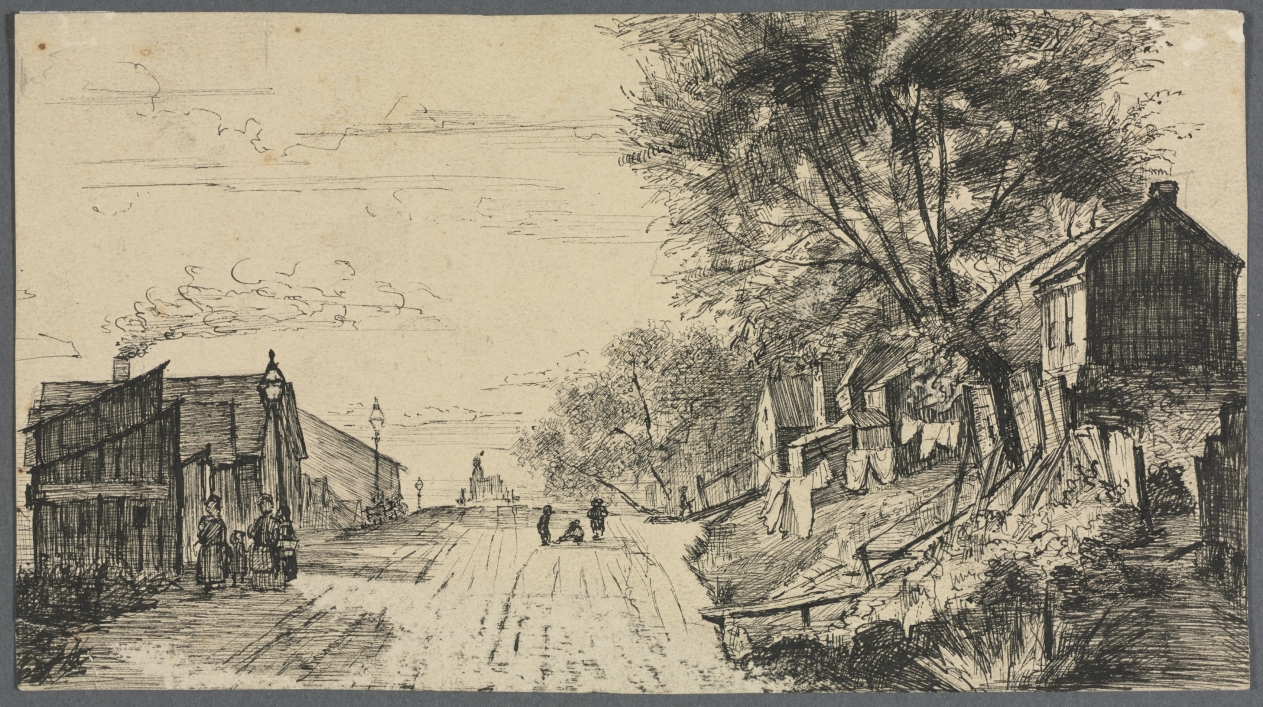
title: Spring Street, Cleveland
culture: America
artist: Otto H. Bacher (American, 1856–1909)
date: c. 1870–1909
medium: ink on paper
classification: Drawing